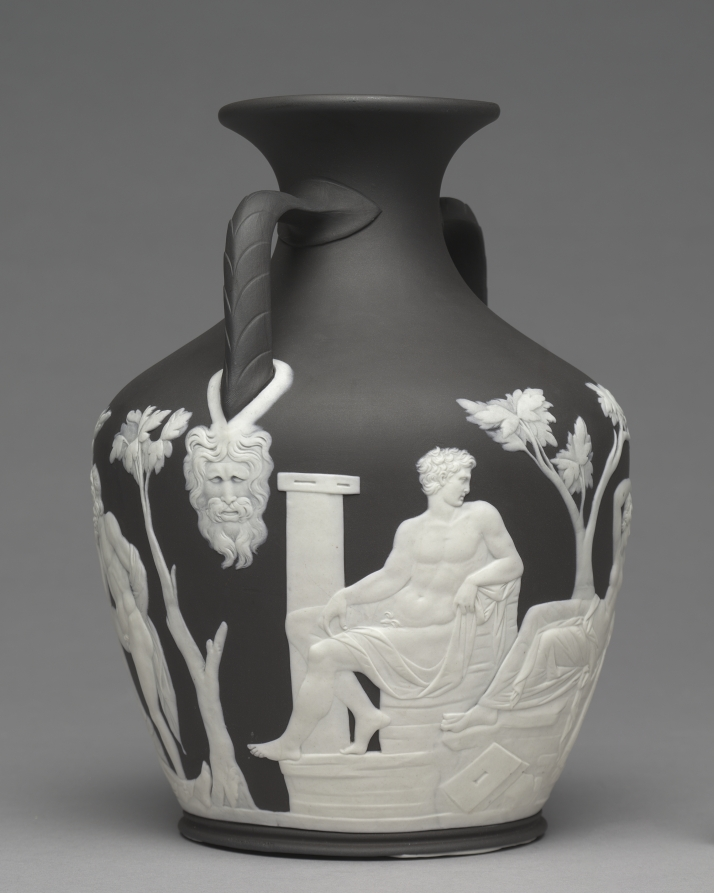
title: Portland Vase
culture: England, Staffordshire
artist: Josiah Wedgwood and Sons (Britain, Staffordshire, est. 1759)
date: c.1790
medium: jasperware with applied decoration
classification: Ceramic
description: The original Portland Vase is a Roman antiquity, made of dark-blue glass, dating from the first century AD. Such a rare archaeological find fascinated aristocratic collectors and artists alike, and eventually the vase came into the hands of the 3rd Duke of Portland in the 1780s. Around 1790 the duke lent the vase to the potter Josiah Wedgwood to make exact replicas in ceramic, of which the Cleveland example is one of the first editions. Eventually, the 4th Duke of Portland deposited the original Roman vase in the British Museum, where it resides today.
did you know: While the scene depicted here is not known for certain, many scholars believe that the Portland Vase portrays the wedding of Peleus and Thetis from Greek mythology.